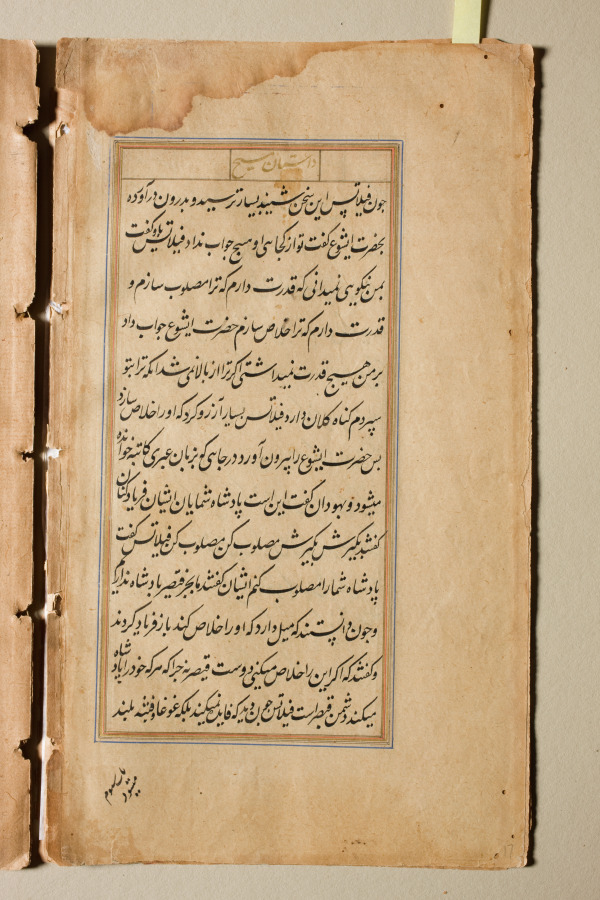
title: Text page from a Mirror of Holiness (Mir’at al-quds) of Father Jerome Xavier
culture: Mughal India, Allahabad, made for Prince Salim (1569–1627)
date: 1602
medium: Ink and gold on paper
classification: Manuscript